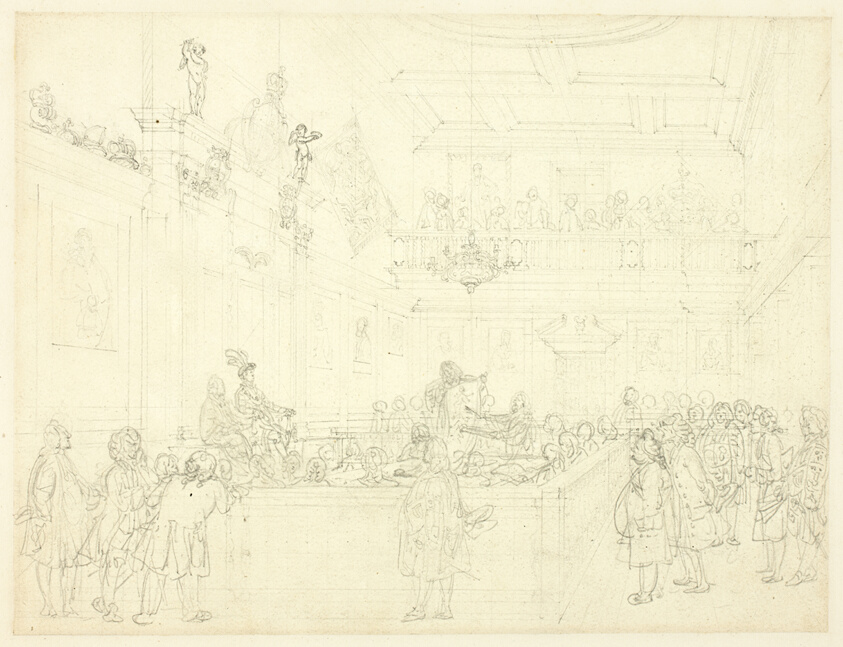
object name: Drawing and Watercolor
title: Study for Herald's College, The Hall, from Microcosm of London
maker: Augustus Charles Pugin (English, born France, 1762-1832); Thomas Rowlandson (English, 1756-1827)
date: c. 1808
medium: Pen and brown ink with brush and watercolor with graphite, on ivory wove paper, laid down on board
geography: England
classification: pen and ink drawings; graphite; drawings (visual works); prints and drawing